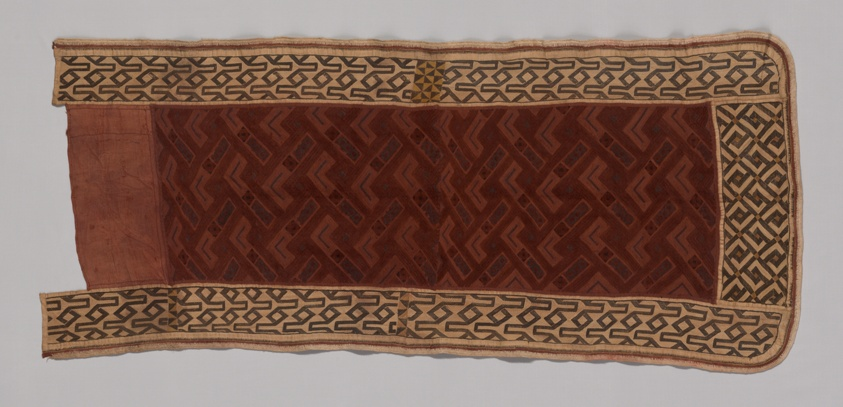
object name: Costume and Accessories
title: Woman's Overskirt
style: kuba kingdom, Arts of Africa, african, kuba (democratic republic of congo style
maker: Kuba, Bushong; Democratic Republic of the Congo, Mushenge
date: 19th century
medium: Raffia, plain weave; pieced; embroidered in lateral looping, and stem and running stitches cut to form pile; couching; joined by buttonhole, pearl, and trammed twisted buttonhole stitches; edged in lateral looping stitches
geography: Democratic Republic of the Congo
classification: textile; needlework (visual works); arts of Africa; costume; dress (garment); clothing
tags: geometric